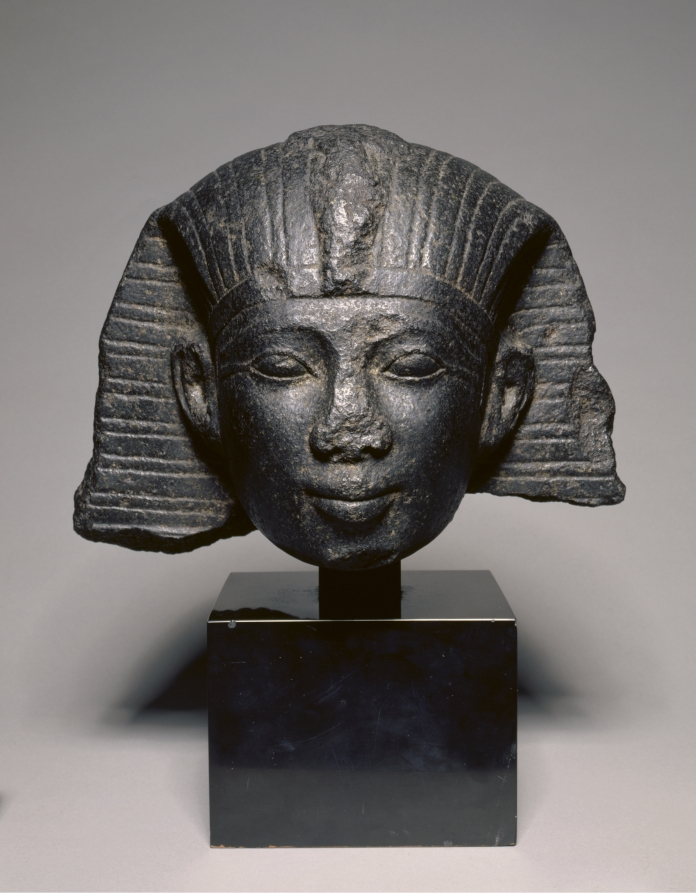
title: Head of a King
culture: Egypt, Third Intermediate (1069–715 BCE), Dynasties 21–22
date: c. 1069–715 BCE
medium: granodiorite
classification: Sculpture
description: This head was the first Egyptian royal sculpture to enter the museum. Although regal in appearance, the rather generalized facial features are not indicative of any specific ruler. It appears to be a work of the Third Intermediate Period, when artists drew inspiration from the elegant, idealizing style of the 18th Dynasty.